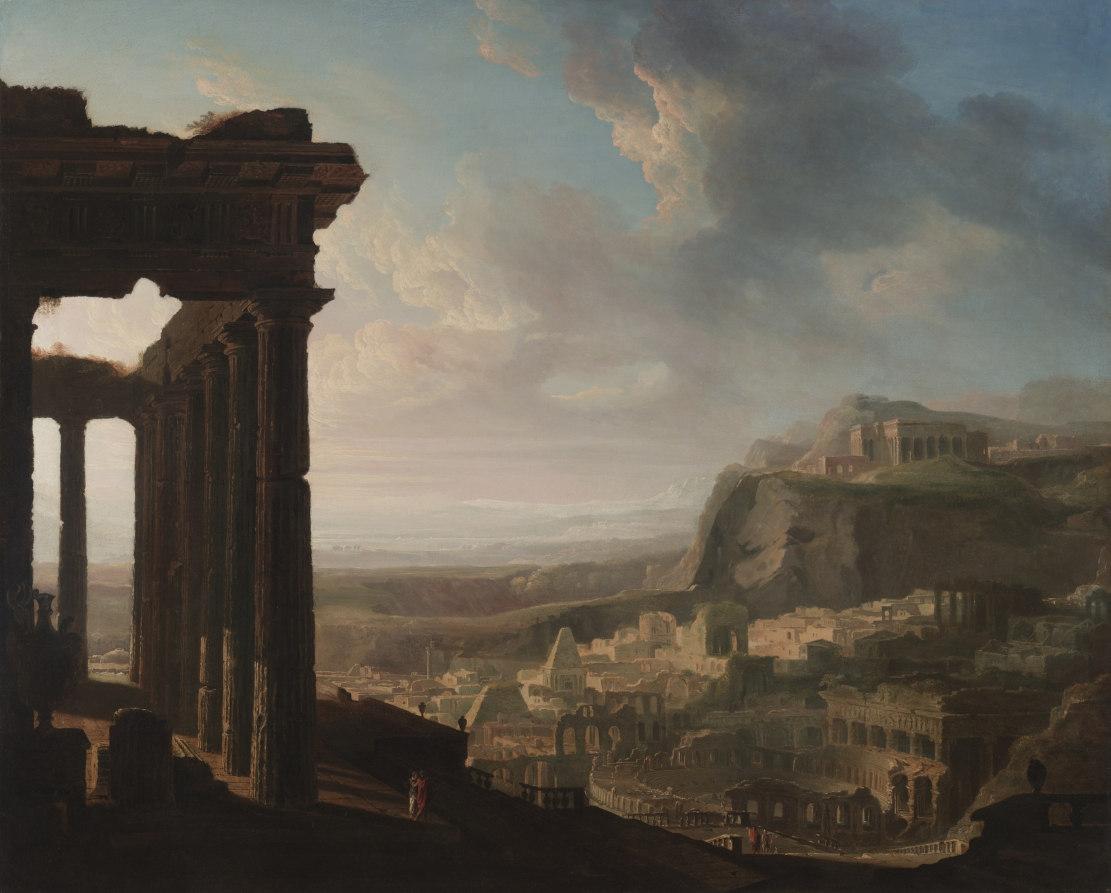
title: Ruins of an Ancient City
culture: England, 19th century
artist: John Martin (British, 1789–1854)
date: c. 1810–20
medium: oil on paper, mounted on canvas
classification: Painting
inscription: Signed lower right: j. martin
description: The painting depicts an imagined scene of a ruined ancient city bathed in the nostalgic glow of twilight. The artist's detailed, almost archeological, interest in these Greek or Roman buildings is characteristic of neoclassicism, although the composition—which plunges suddenly from the foreground into a deep valley—and dramatic lighting are typical of Romantic painting.